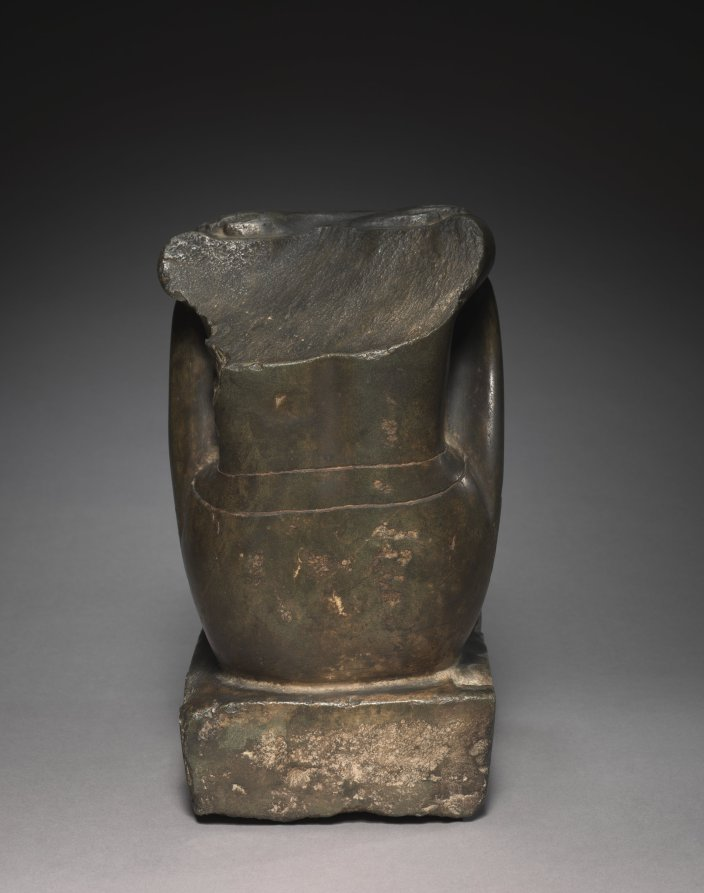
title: Block Statue of the Royal Acquaintance, Horwedja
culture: Egypt, Late period (715–332 BCE), Dynasty 26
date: 664–525 BCE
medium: graywacke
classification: Sculpture